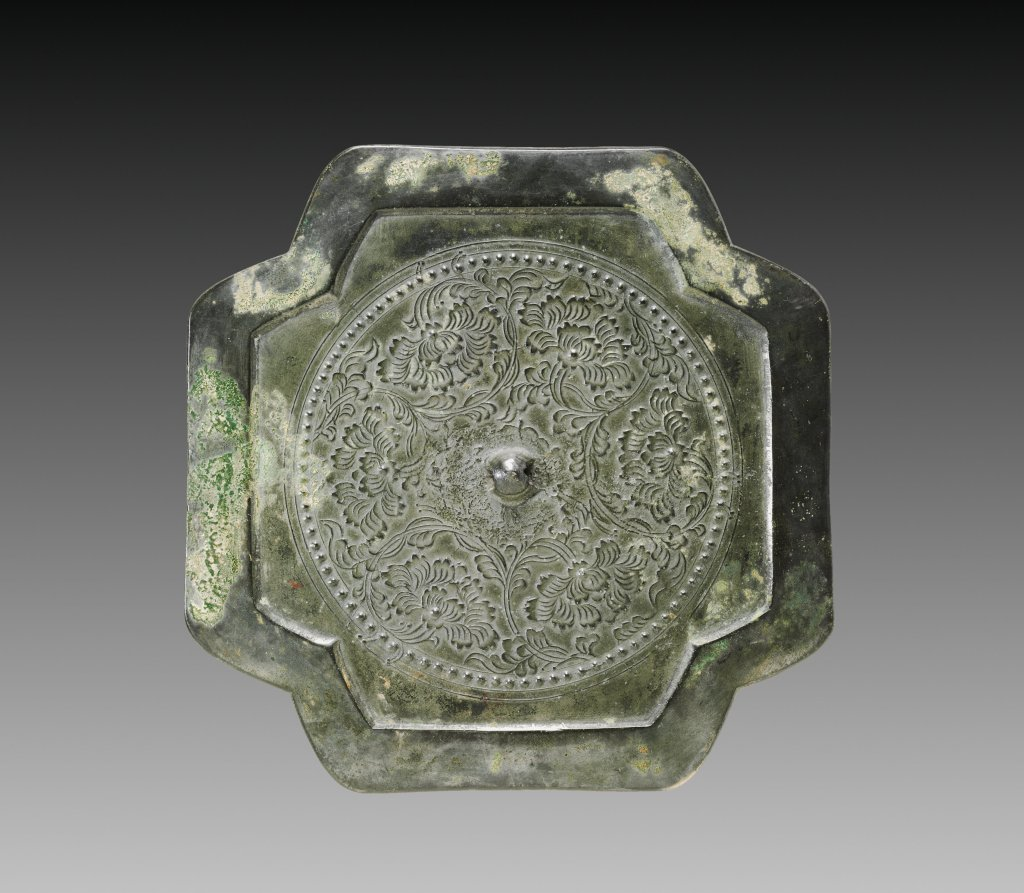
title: Cruciform Mirror with Six Blossoms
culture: China, Northern Song dynasty (960-1127)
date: 960–1127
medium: bronze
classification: Metalwork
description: This cross-shaped mirror has a simple wide frame and a small knob. A part of the floral pattern surrounding the knob has been compromised, likely due to poor casting or damage. The mirror is decorated with designs of flower branches and leaves, which encapsulate six flowers. A few of these branches protrude beyond the beaded circular border to touch the edge of the outer circle, adding a playful dynamism. Similar motifs can be found on silver objects and porcelain of this period.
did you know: Bronze mirrors were made in China from neolithic times until the Qing dynasty, when glass mirrors were brought to China from the West.